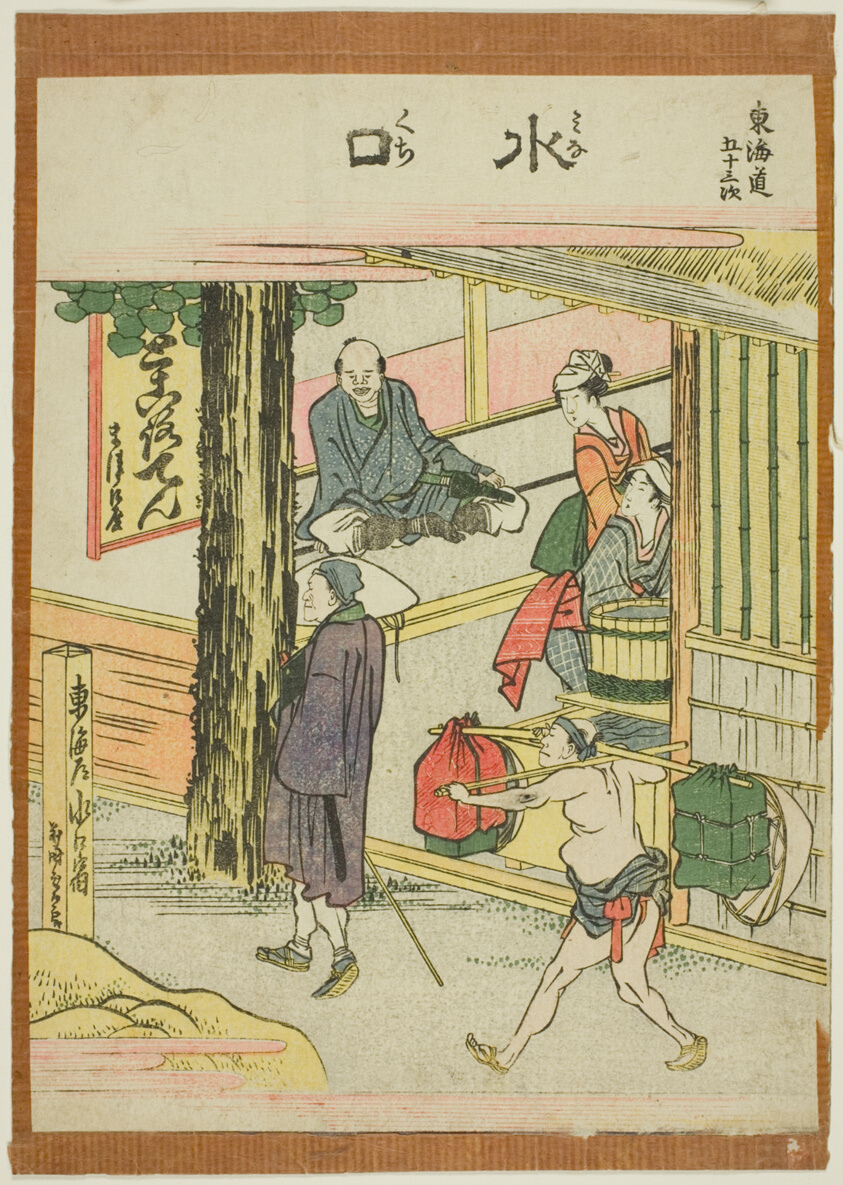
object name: Print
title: Minakuchi, from the series "Fifty-three Stations of the Tokaido (Tokaido gojusan tsugi)"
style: Japanese (culture or style)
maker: Katsushika Hokusai 葛飾 北斎; Japanese, 1760-1849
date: c. 1806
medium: Color woodblock print; chuban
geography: Japan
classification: woodblock print; print; asian art